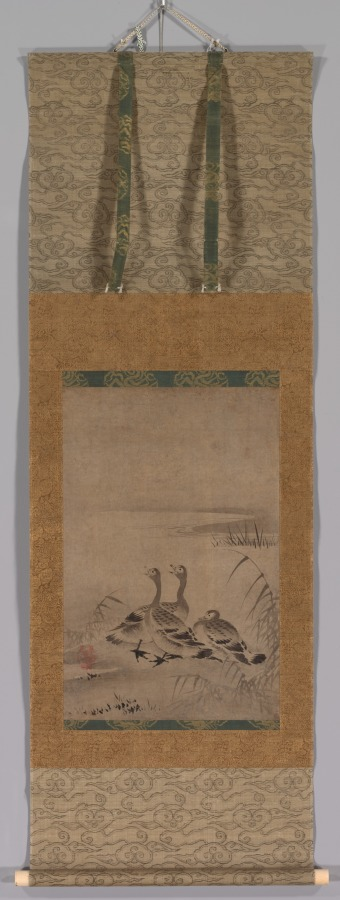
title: Wild Geese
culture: Japan, Muromachi period (1392–1573)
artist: Chōkichi (Japanese)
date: early 1500s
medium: hanging scroll; ink on paper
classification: Painting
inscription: Gourd-shaped seal of Chokichi at lower left